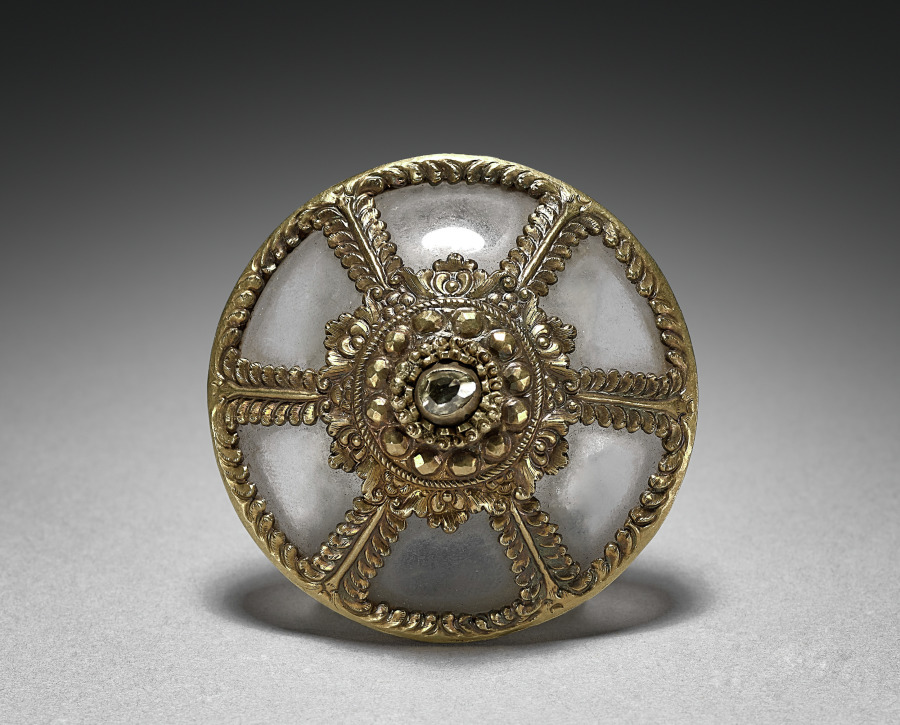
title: Box, with Top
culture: Java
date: 20th Century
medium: glass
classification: Glass